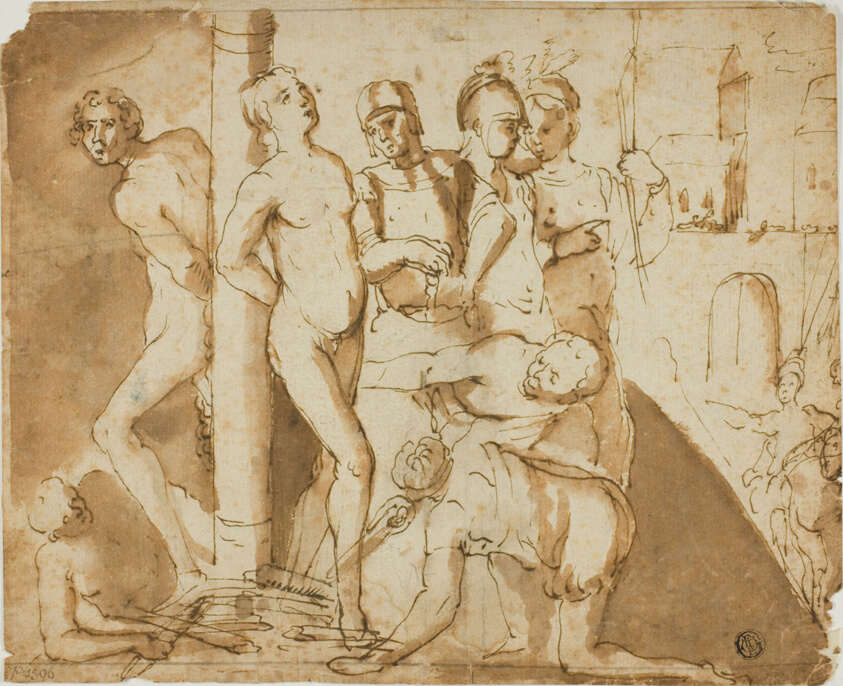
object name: Drawing and Watercolor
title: Martyrdom of Two Saints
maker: Unknown artist (Italian (?))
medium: Pen and brown ink, with brush and brown wash, over traces of black chalk on ivory laid paper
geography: Italy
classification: drawings (visual works); prints and drawing